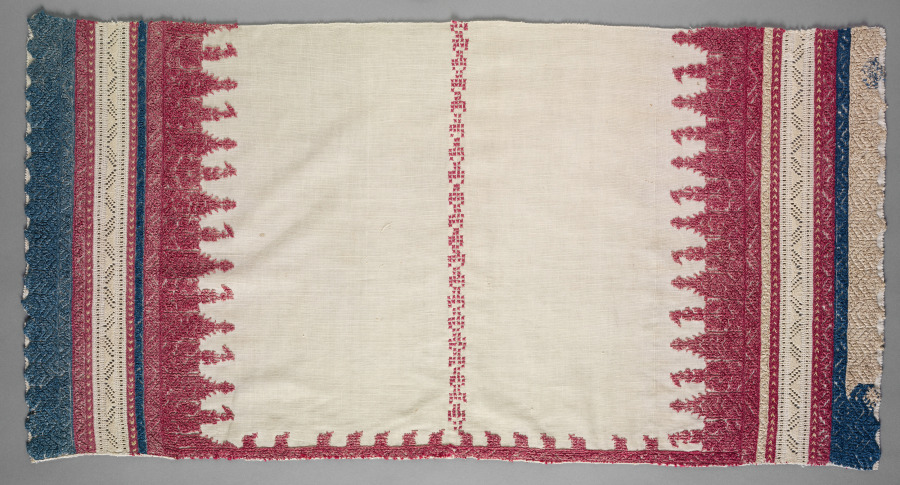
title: Furnishing textile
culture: Africa, North Africa, Morocco, Salé, Moroccan embroiderer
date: 1800s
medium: Cotton, silk, dye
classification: Embroidery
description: This densely embroidered textile was possibly used as a pillow cover. The elongated motifs have been interpreted by scholars as trees, storks, or minarets (tall towers of a mosque). The use of these motifs is sometimes referred to as the "Old Salé" style, named for the city in which it was made.